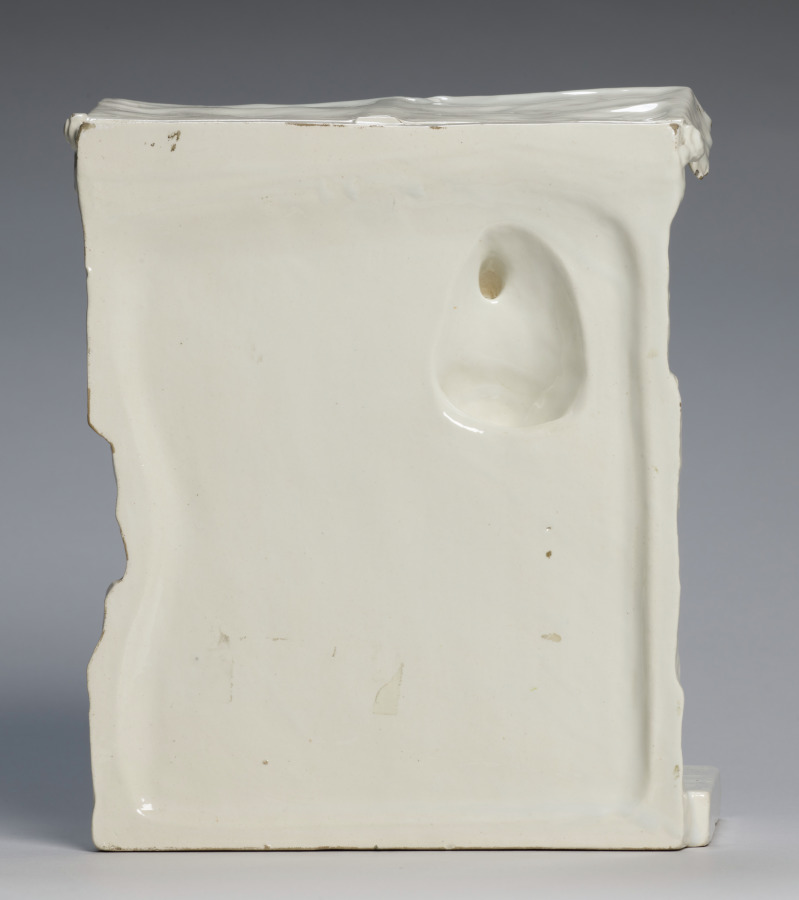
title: The Cobbler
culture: Italy or France, 19th century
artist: after a design by Paul-Louis Cyfflé (Flemish, 1724–1806)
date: 1800s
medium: earthenware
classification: Ceramic